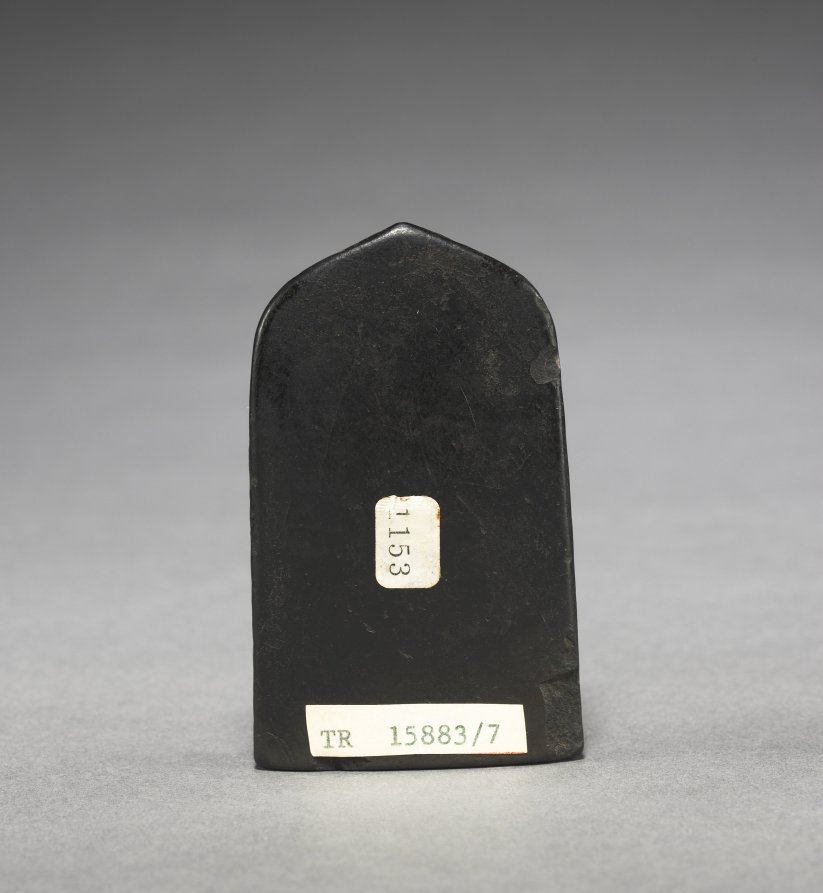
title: Stele with Durga Figure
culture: India, Sena dynasty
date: 1100s-1200s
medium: black chlorite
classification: Sculpture